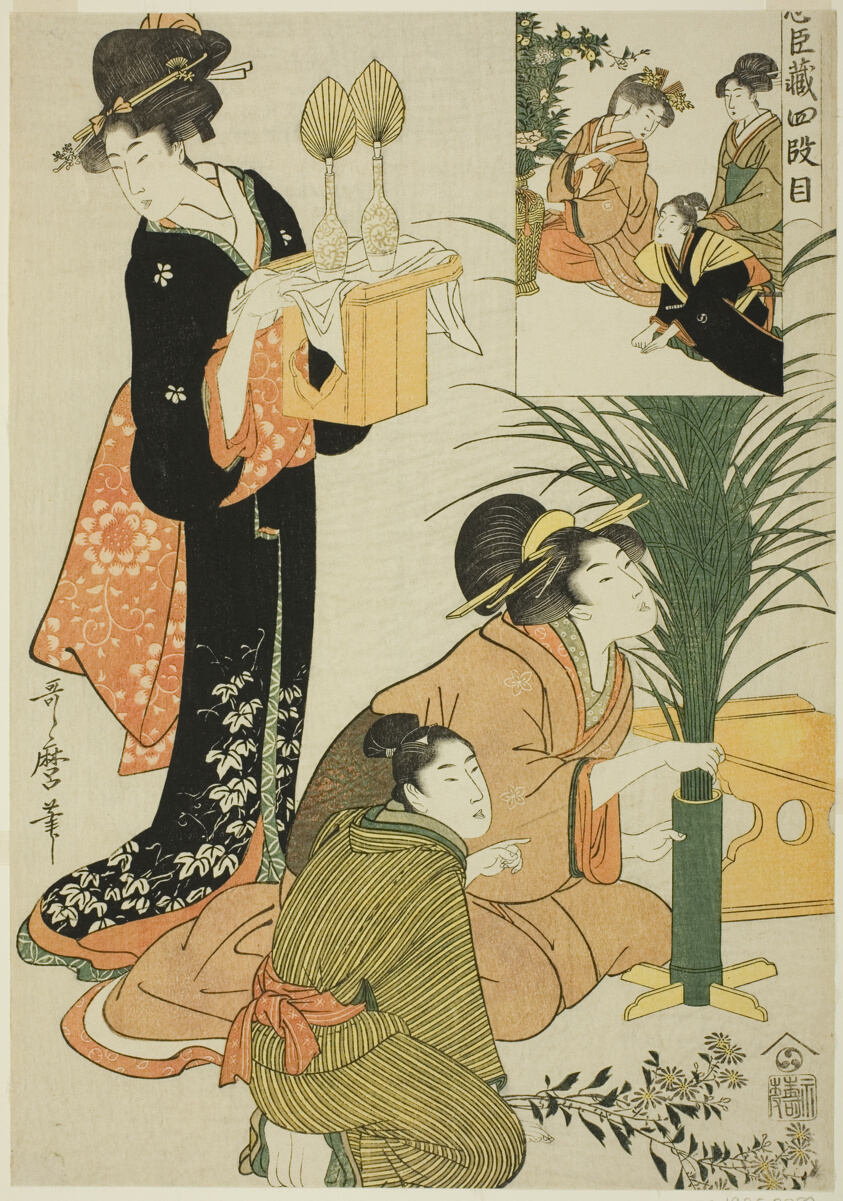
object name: Print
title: Act IV, from Treasury of the Loyal Retainers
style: Japanese (culture or style)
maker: Kitagawa Utamaro 喜多川 歌麿; Japanese, 1753 (?)-1806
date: c. 1801/02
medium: Color woodblock print; oban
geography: Japan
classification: woodblock print; print; asian art